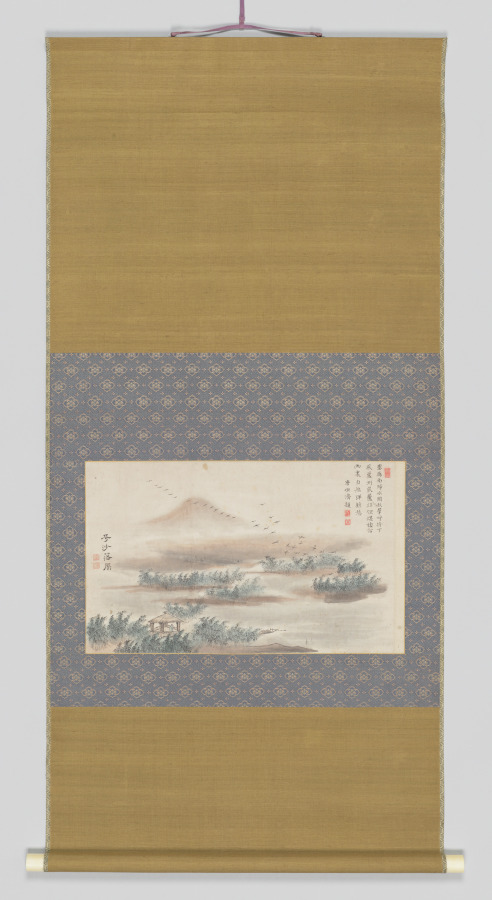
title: Wild Geese Descending on a Sandbar, from Eight Views of Xiao-Xiang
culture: Japan, Edo period (1615–1868)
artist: Tani Bunchō (Japanese, 1763–1841)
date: 1788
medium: album leaf remounted as a hanging scroll; ink and color on paper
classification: Painting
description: This painting was part of a set of album leaves representing the Eight Views of Xiao-Xiang, a theme originating in Chinese poetry and painting that spread to both Korea and Japan. Southern China’s Xiao-Xiang area, where the mist-covered banks of the Xiang River created a complex landscape shifting like the moods and minds of people, captured the imaginations of generations of painters and calligraphers. Inscriptions on these works suggest that they were possibly ordered by newly prominent Japanese Confucian scholars.